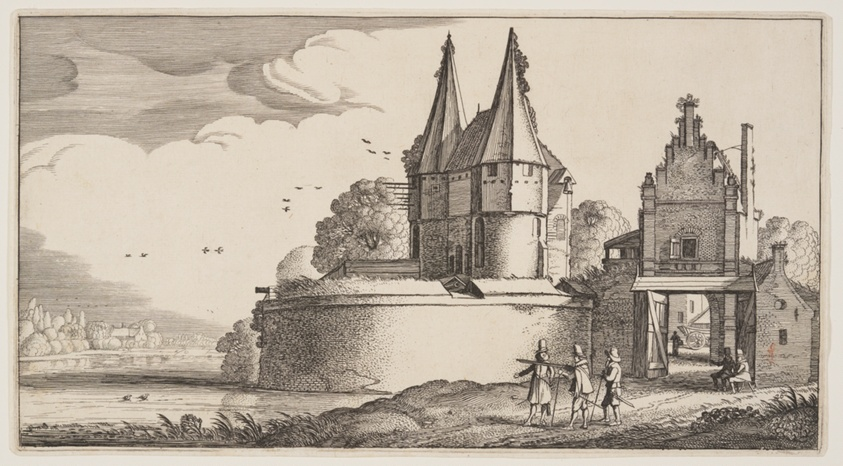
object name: Print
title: Bastion and Town-Gate on a River, from Landscapes (Playsante Lantschappen)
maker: Attributed to Claes Jansz. Visscher II (Dutch, 1586-1652); after Jan van de Velde II (Dutch, c. 1593-1641)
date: c. 1641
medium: Etching, with engraving, on ivory laid paper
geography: Netherlands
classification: etching; paper; print; prints and drawing